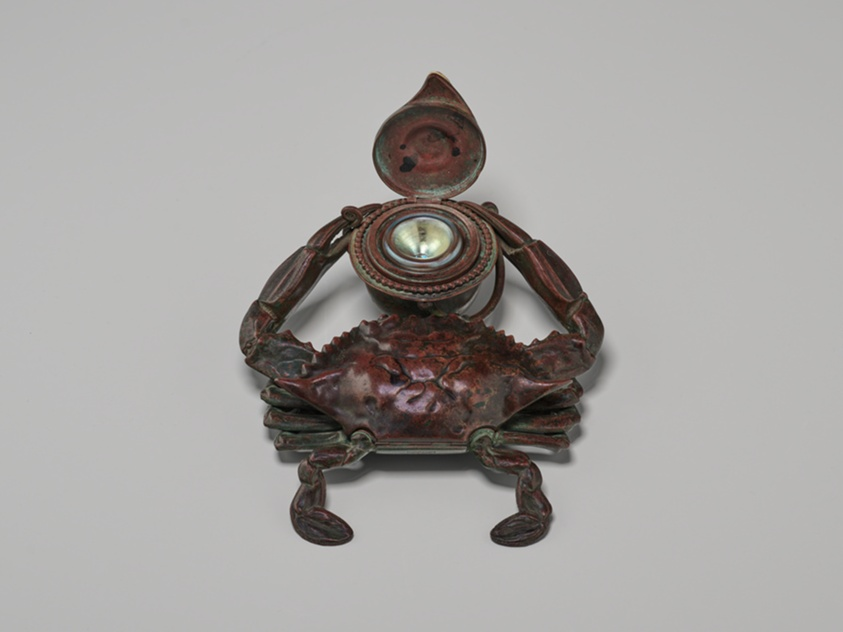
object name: Metalwork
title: “Crab” Inkstand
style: Arts and Crafts Movement, 20th Century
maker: Tiffany Studios (American, 1902–32); Corona, New York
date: c. 1905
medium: Bronze, Favrile glass, and shell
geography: Corona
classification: inkwells; inkwell liners; inkstand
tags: crabs, shells